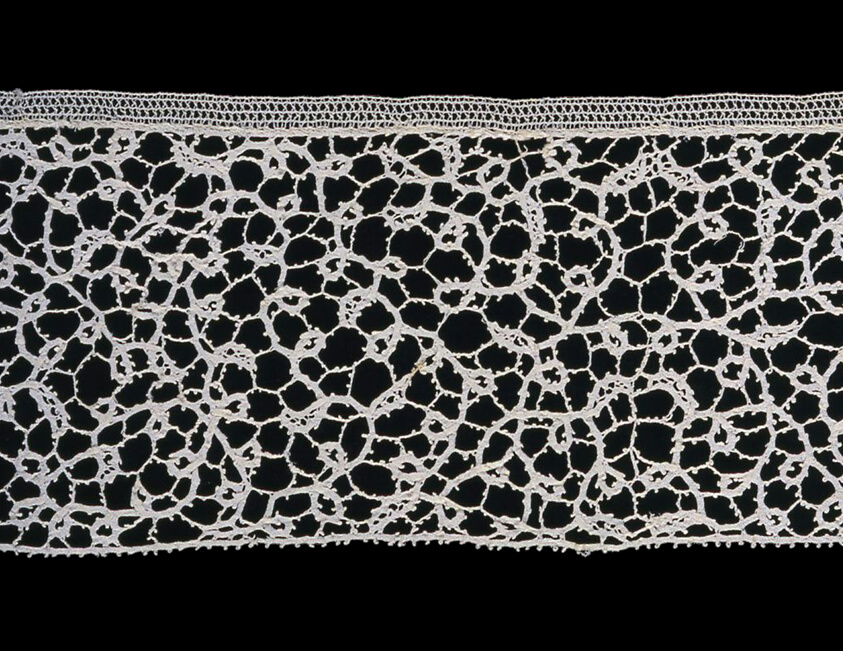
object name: Textile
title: Border (From an Insertion)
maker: Italy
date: c. 1700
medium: Linen, bobbin straight lace (continuous clothwork tapes)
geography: Italy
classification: textile; lace - bobbin